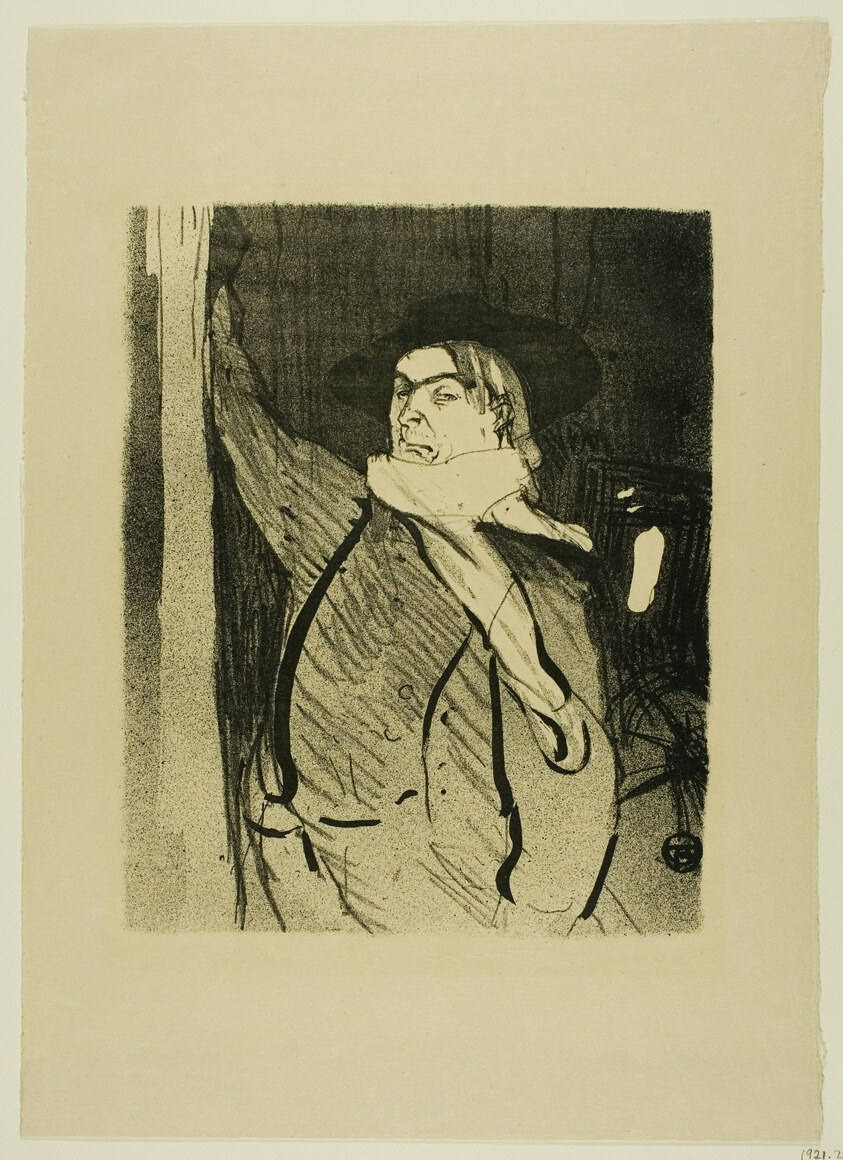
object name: Print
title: Aristide Bruant, from Le Café-Concert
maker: Henri de Toulouse-Lautrec (French, 1864-1901); printed by Edward Ancourt & Cie (French, 19th-20th c.); published by L'Estampe originale (French, 1893-1895)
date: 1893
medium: Lithograph on cream wove paper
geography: France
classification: lithograph; print; prints and drawing